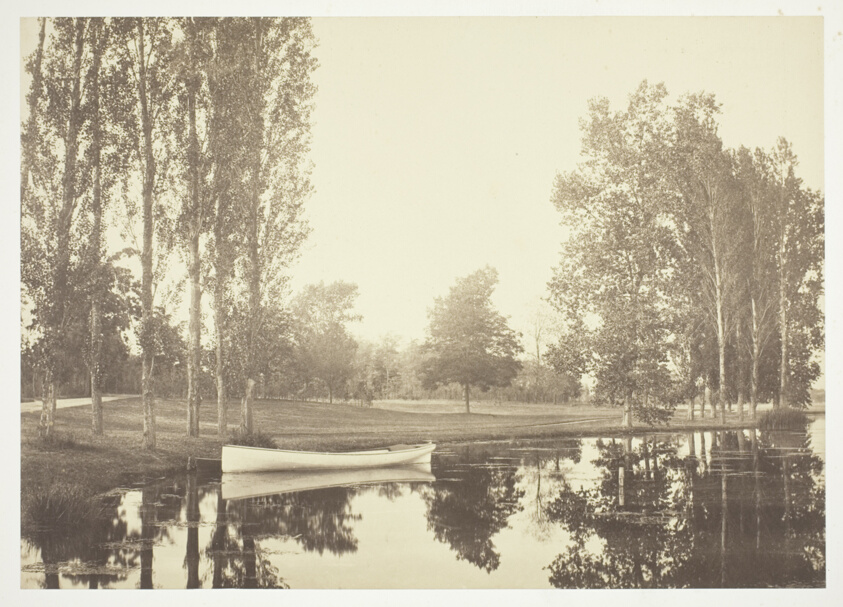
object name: Photograph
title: Untitled, from the series "Bois de Boulogne"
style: 19th century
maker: Charles Marville (French, 1813–1879)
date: c. 1850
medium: Albumen print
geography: France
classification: albumen silver print; photographic process; photography; photograph